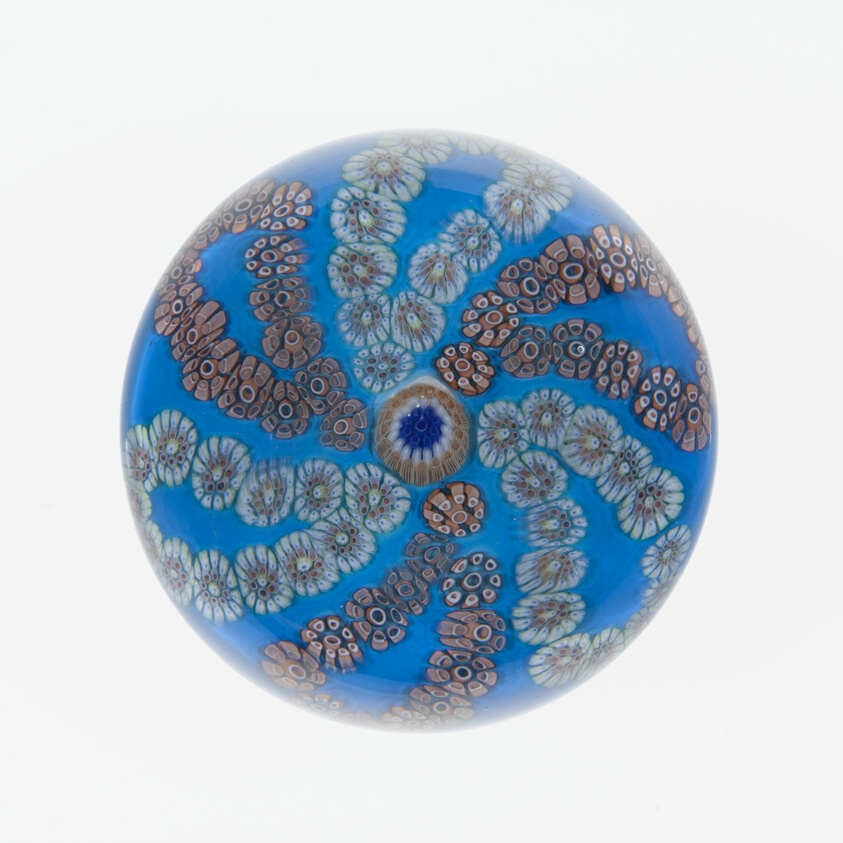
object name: Glass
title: Paperweight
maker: Saint-Louis Glassworks (Cristalleries de Saint-Louis); Lorraine, France, founded 1586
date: 19th century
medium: Glass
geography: Saint-Louis-lès-Bitche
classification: paperweight; millefiori; european decorative arts; glass